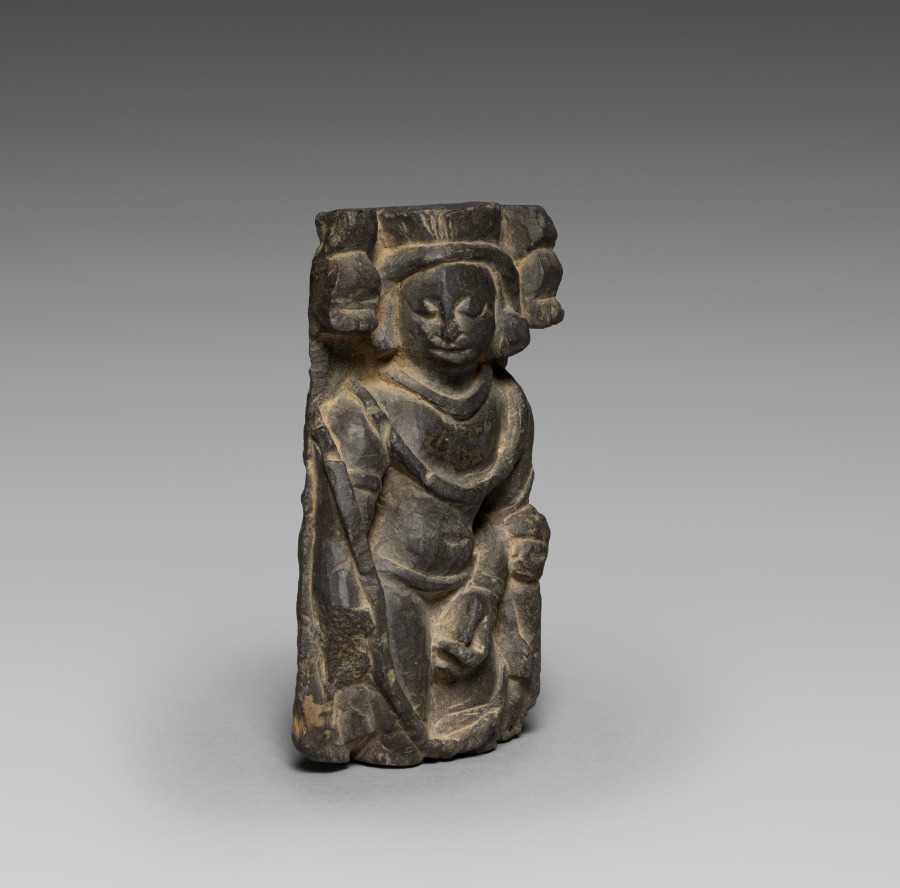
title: Male Figure, Possibly Indra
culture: Pakistan, Gandhara, possibly Swat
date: 300s–400s CE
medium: schist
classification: Sculpture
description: This carving appears to be unfinished, showing only the broad strokes of the male figure. The flat-topped crown is characteristic of Indra, which may be the identity of this figure.